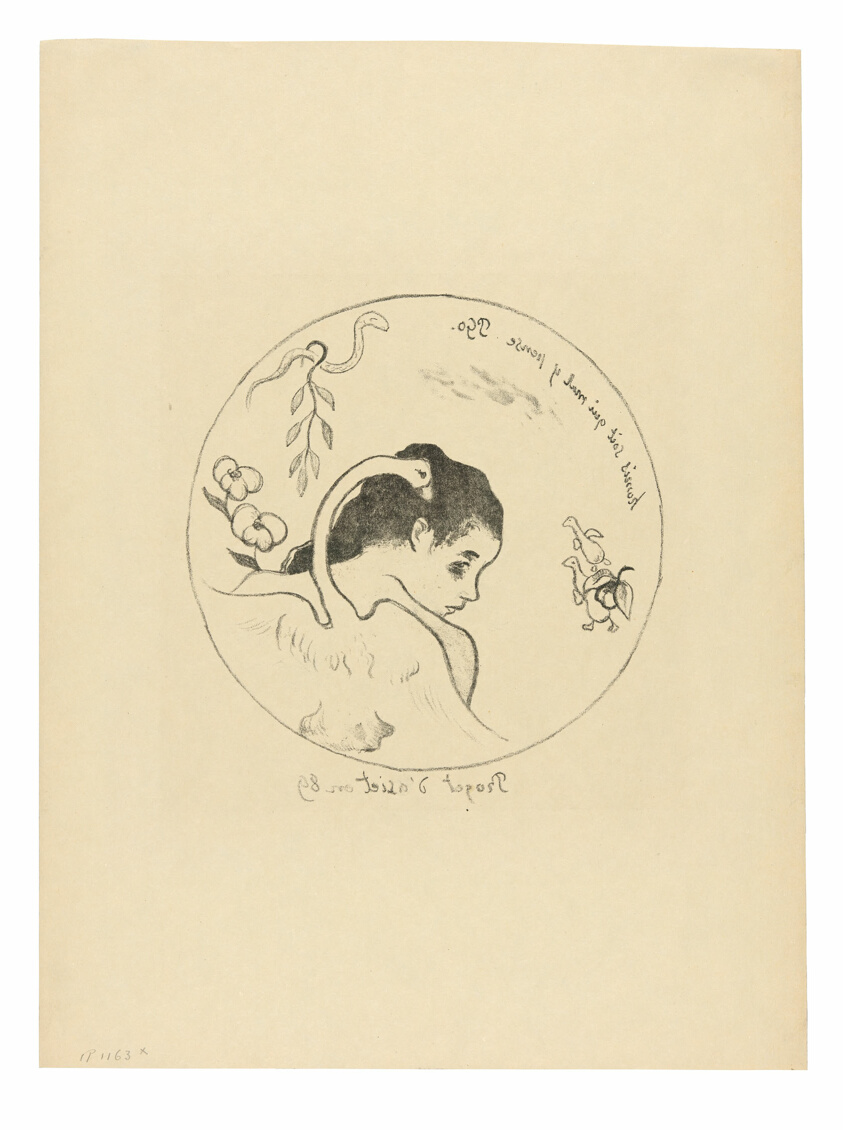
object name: Print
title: Projet d’assiette (Leda) (Design for a Plate [Leda]), frontispiece from the Volpini Suite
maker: Paul Gauguin (French, 1848-1903); published by Ambroise Vollard (French, 1867-1939)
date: 1889, printed after 1911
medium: Zincograph in black on ivory wove paper (imitation Japanese vellum)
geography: France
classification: zincograph; lithograph; print; prints and drawing